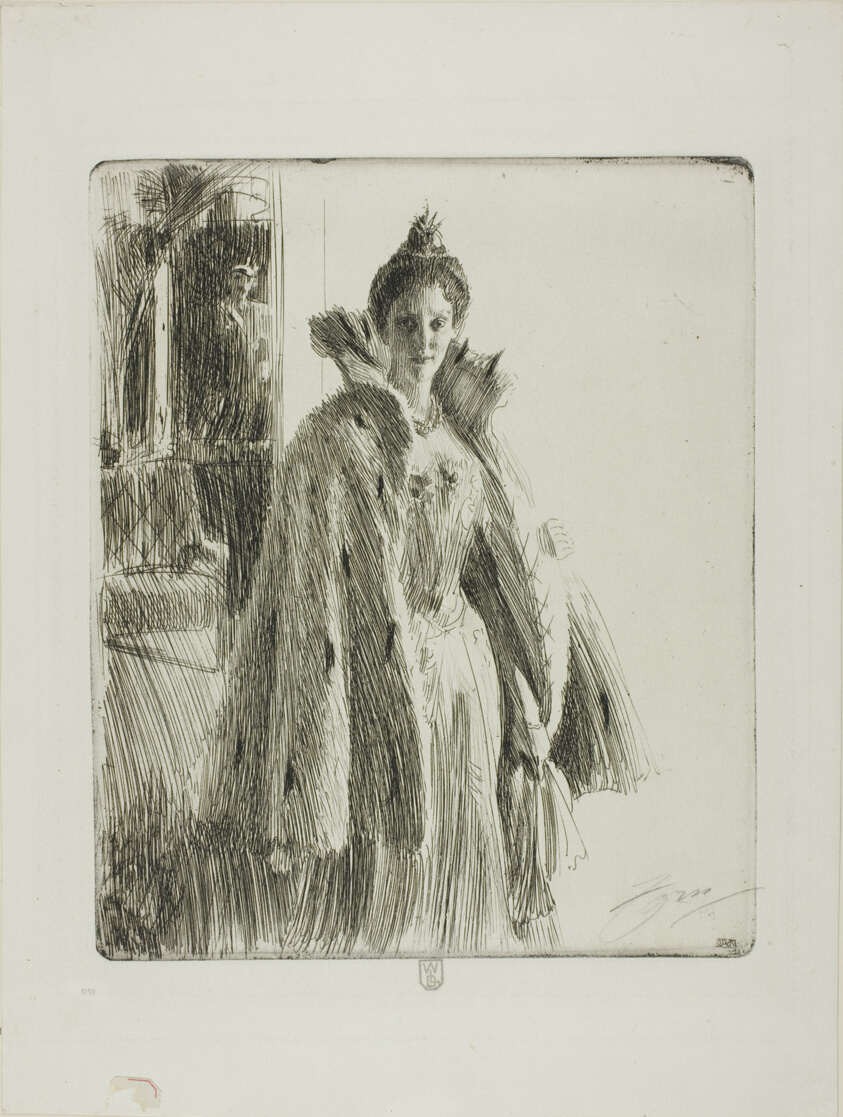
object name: Print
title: H. R. H. Princess Ingeborg of Sweden II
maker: Anders Zorn (Swedish, 1860-1920)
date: 1900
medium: Etching on white wove paper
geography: Sweden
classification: etching; print; prints and drawing